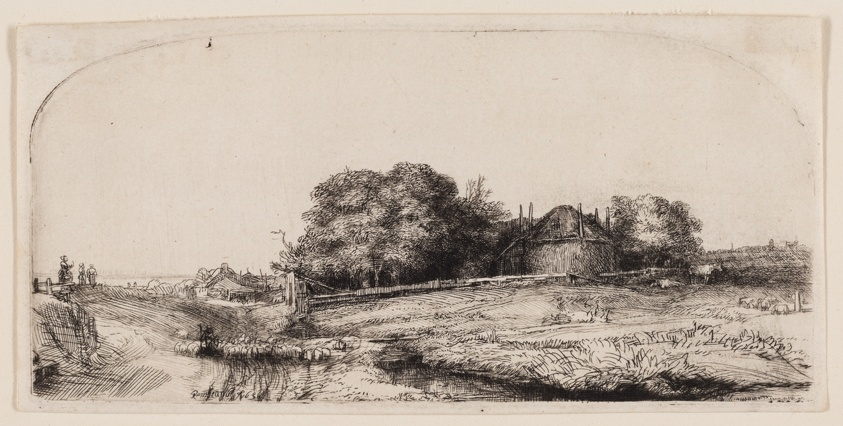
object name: Print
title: Cottages and a Hay Barn on the Diemerdijk with a Flock of Sheep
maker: Rembrandt van Rijn (Dutch, 1606-1669)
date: 1650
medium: Etching and drypoint on ivory paper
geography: Holland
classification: etching; print; prints and drawing; paper; drypoint